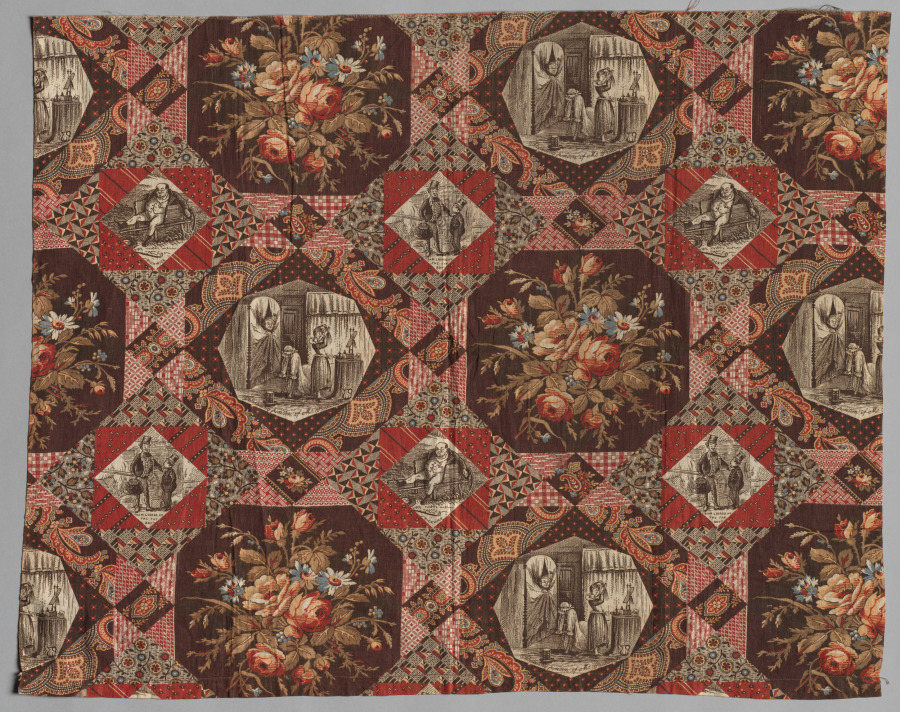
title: Roller Printed Cotton Textile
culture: America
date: 19th century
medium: plain cloth, roller printed: cotton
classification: Textile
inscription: scenes contain titles from Dickens's "Pickwick Papers."